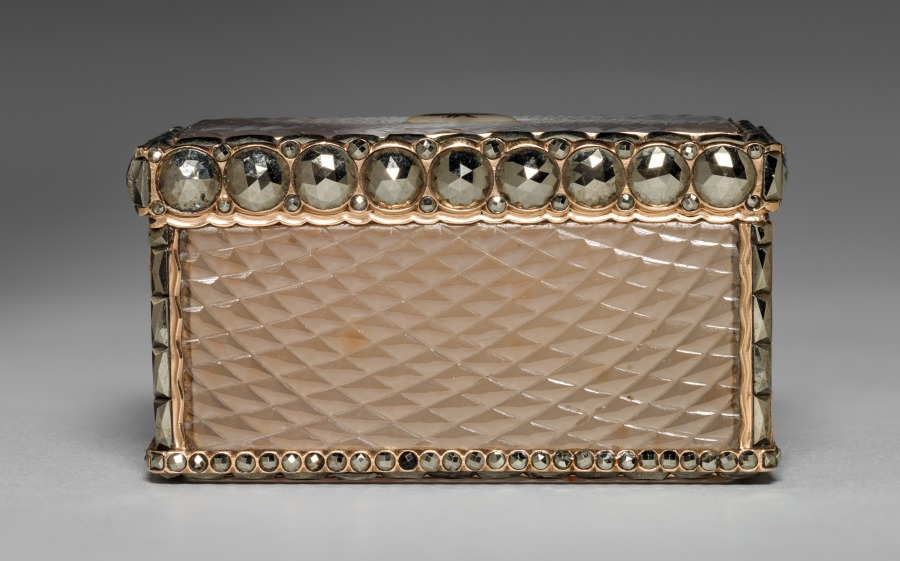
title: Snuff Box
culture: England, London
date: c. 1750–60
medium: gold-mounted agate, engine-turned panels, hematites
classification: Miscellaneous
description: Luxurious personal objects, like this snuff box, were an essential part of a privileged wardrobe during the 1700s and early 1800s, emphasizing their owner’s refinement and wealth. Their glittering surfaces, however, disguised a system based on the labor and suffering of enslaved or indentured people, whether in gold or gemstone mines, tobacco farms, or shops where these goods were made. Like cotton, sugar, and tea, snuff came from British colonies in America, India, and the Caribbean, where enslaved people were exploited to grow these crops under extremely harsh conditions.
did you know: This small, elaborate box held snuff, a form of powdered tobacco that was inhaled in tiny amounts.